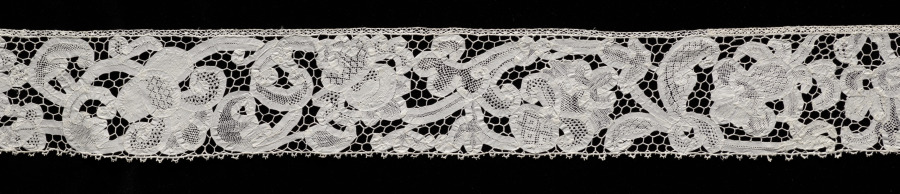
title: Lace Edging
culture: Italy, Genoa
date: 1700s–1800s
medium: Linen: needle lace and bobbin lace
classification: Lace